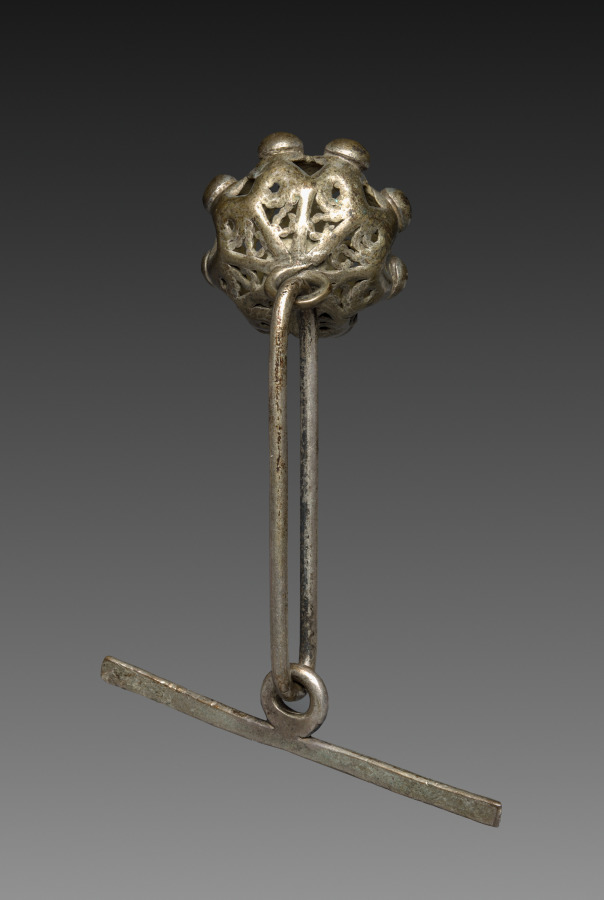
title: Button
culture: Italy, Sardinia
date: 1800s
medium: silver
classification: Jewelry